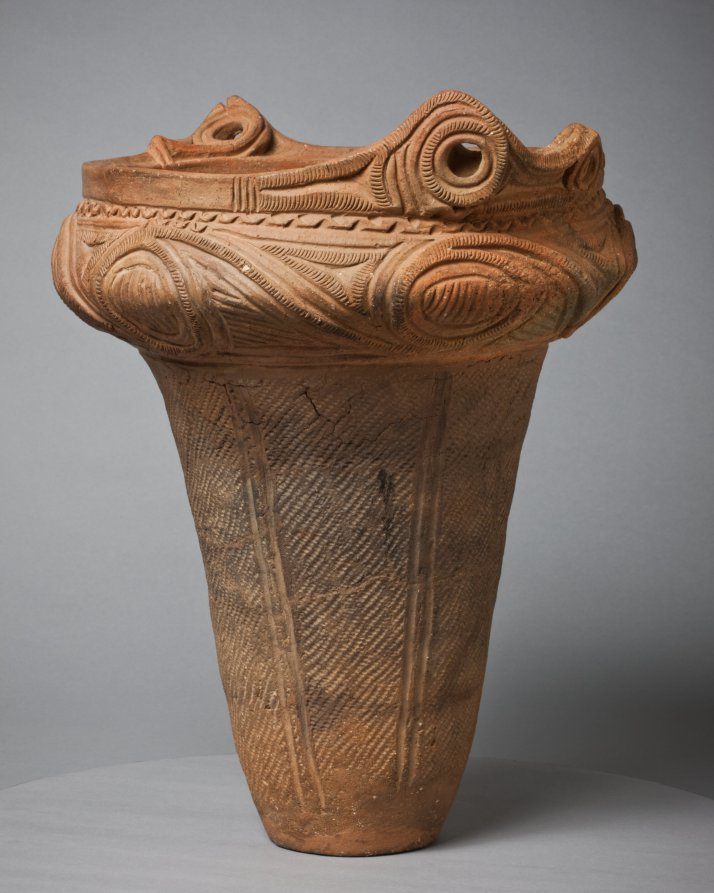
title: Urn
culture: Japan, Jōmon period (c. 10,500–300 BCE)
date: c. 2000 BCE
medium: earthenware, terracotta, impressed and incised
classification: Ceramic